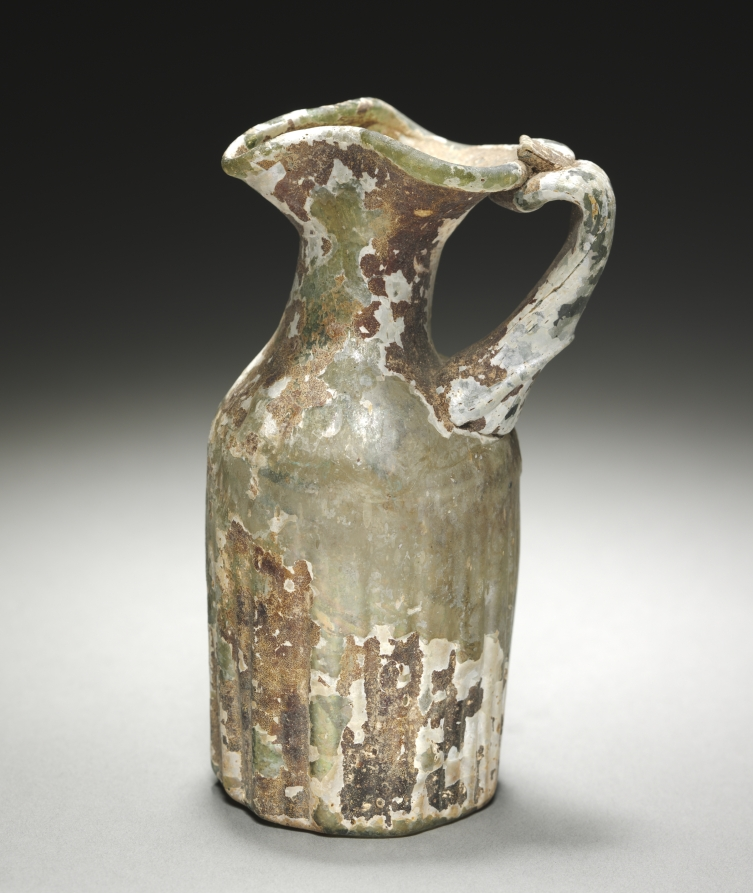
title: Jug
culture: Syro-Palestinian, Roman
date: 300s CE or later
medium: glass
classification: Glass